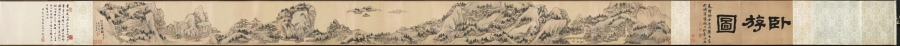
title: Dream Journey among Rivers and Mountains, no. 90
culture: China, Qing dynasty (1644-1911)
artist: Cheng Zhengkui (Chinese, 1604–1676)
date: 1658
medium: Handscroll; ink and color on paper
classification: Painting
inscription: 江山臥遊圖其九十, 青溪道人, 戊戌夏五。 [印] 程正揆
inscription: Title and inscription by Huang Yi 黃易 (1744–1802), and 3 seals.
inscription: 1 colophon and 9 additional seals: 3 seals of Dai Zhi 戴植 (active about 1821–1850); 1 colophon, dated 1914, and 3 seals of Yan Shiqing 顏世清 (1873–1929); 3 seals of Wang Nanping 王南屏 (1924–1985).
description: Cliffs and waterfalls interspersed with trees and dotted vegetation are spread over this handscroll. Long paths wind their way through villages, beside cottages, shrines, and over bridges. In the past, Chinese literati officials liked to take a “dream journey” along mountains and rivers when viewing landscape paintings in their studios. Scenery of this kind thus became a way to escape from the world of bureaucracy and administration. The painter Cheng Zhengkui used the title “Dream Journey” for a whole series of paintings, of which this is number 90. He is said to have painted 500 of them, but the actual count remains unknown.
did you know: Cheng Zhengkui planned to make 100 dream journey paintings but may have ultimately made 500.